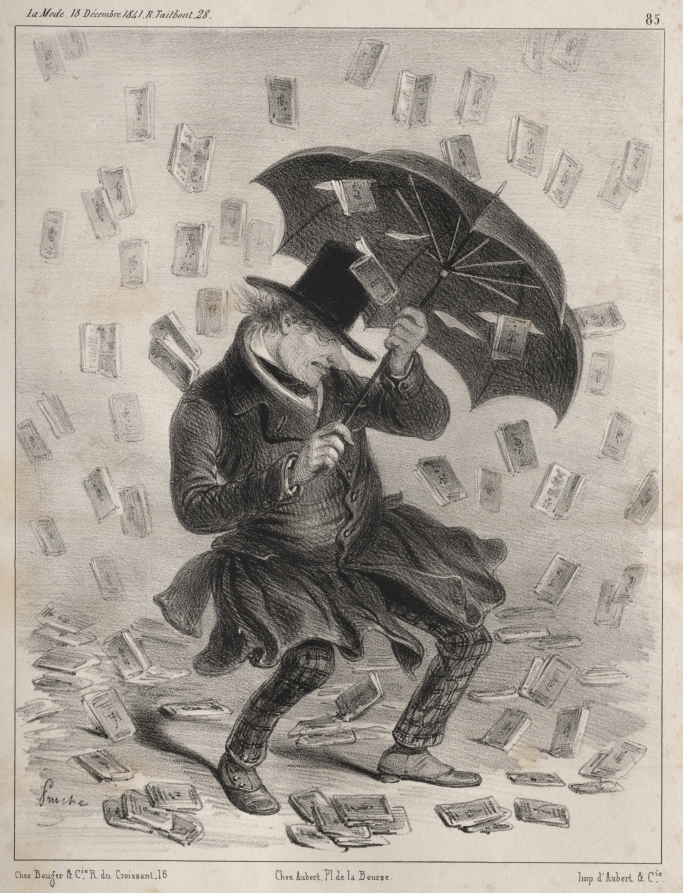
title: Actualités: Comment! on ne fera pas des processions pour faire changer ce temps là?.....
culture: France, 19th century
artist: Clémente Pruche (French, 1831–1870)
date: c. 1839–41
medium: lithograph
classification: Print